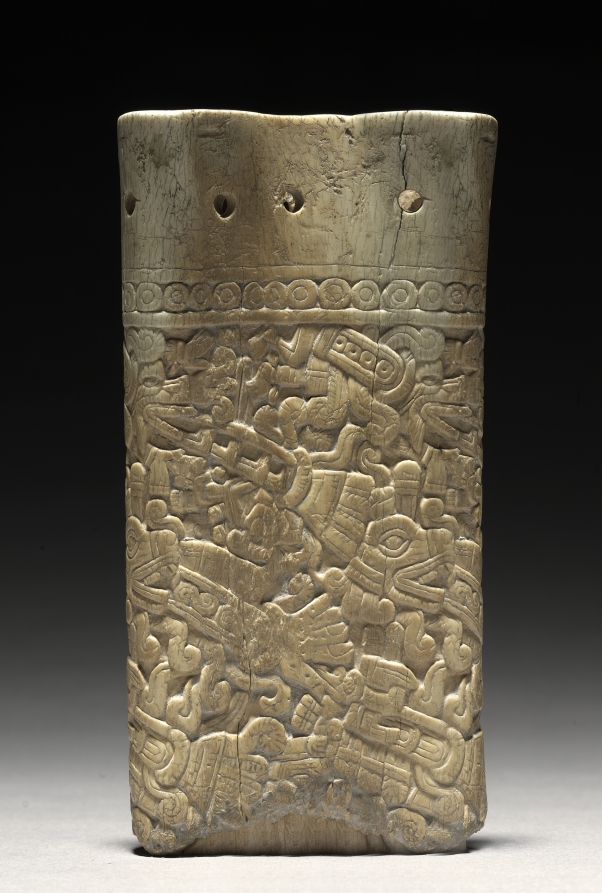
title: Carved Tube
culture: Mexico, Oaxaca, Mixtec, 13th-16th century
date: c. 1200–1519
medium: bone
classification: Jewelry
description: Carved in spiral registers, the ornamentation on this bone tube resembles Mixtec painting, both in codices (screenfold books) and architectural murals.